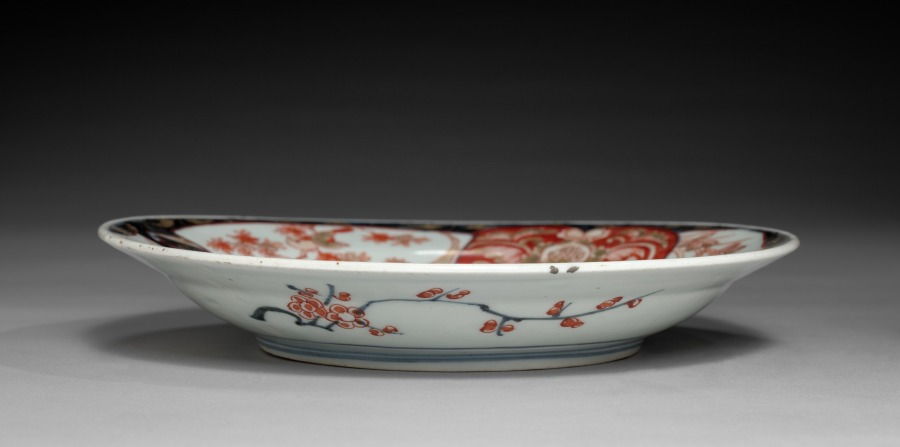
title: Plate with Vase of Peonies: Imari Ware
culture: Japan, Edo period (1615–1868)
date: c. 1700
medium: porcelain with decoration in underglaze blue overglaze, and gold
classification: Ceramic